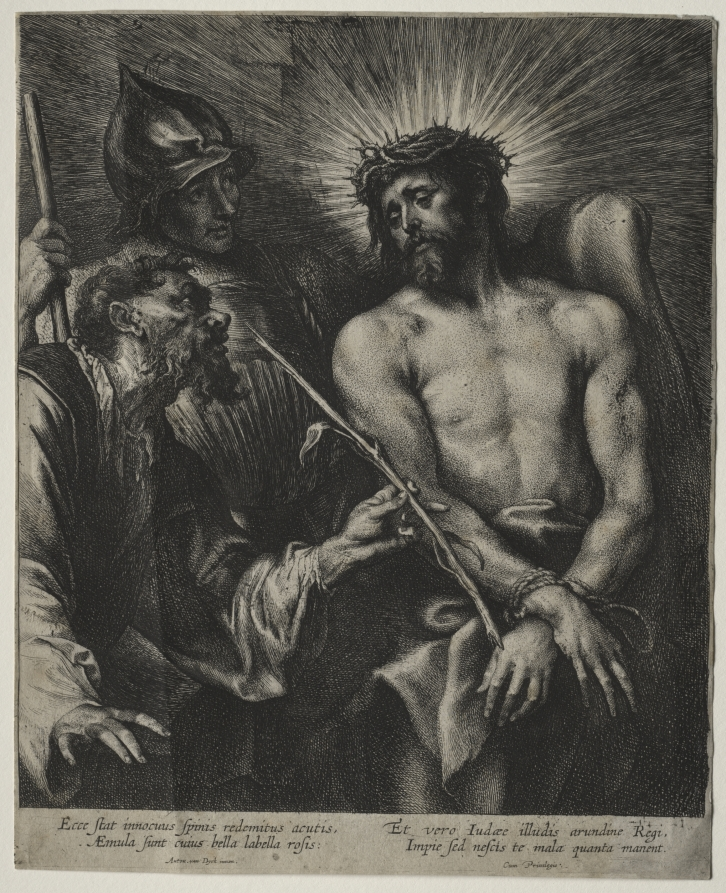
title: Mocking of Christ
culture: Flanders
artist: Anthony van Dyck (Flemish, 1599–1641)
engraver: Lucas Emil Vorsterman (Flemish, 1595–1675)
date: c. 1630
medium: etching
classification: Print